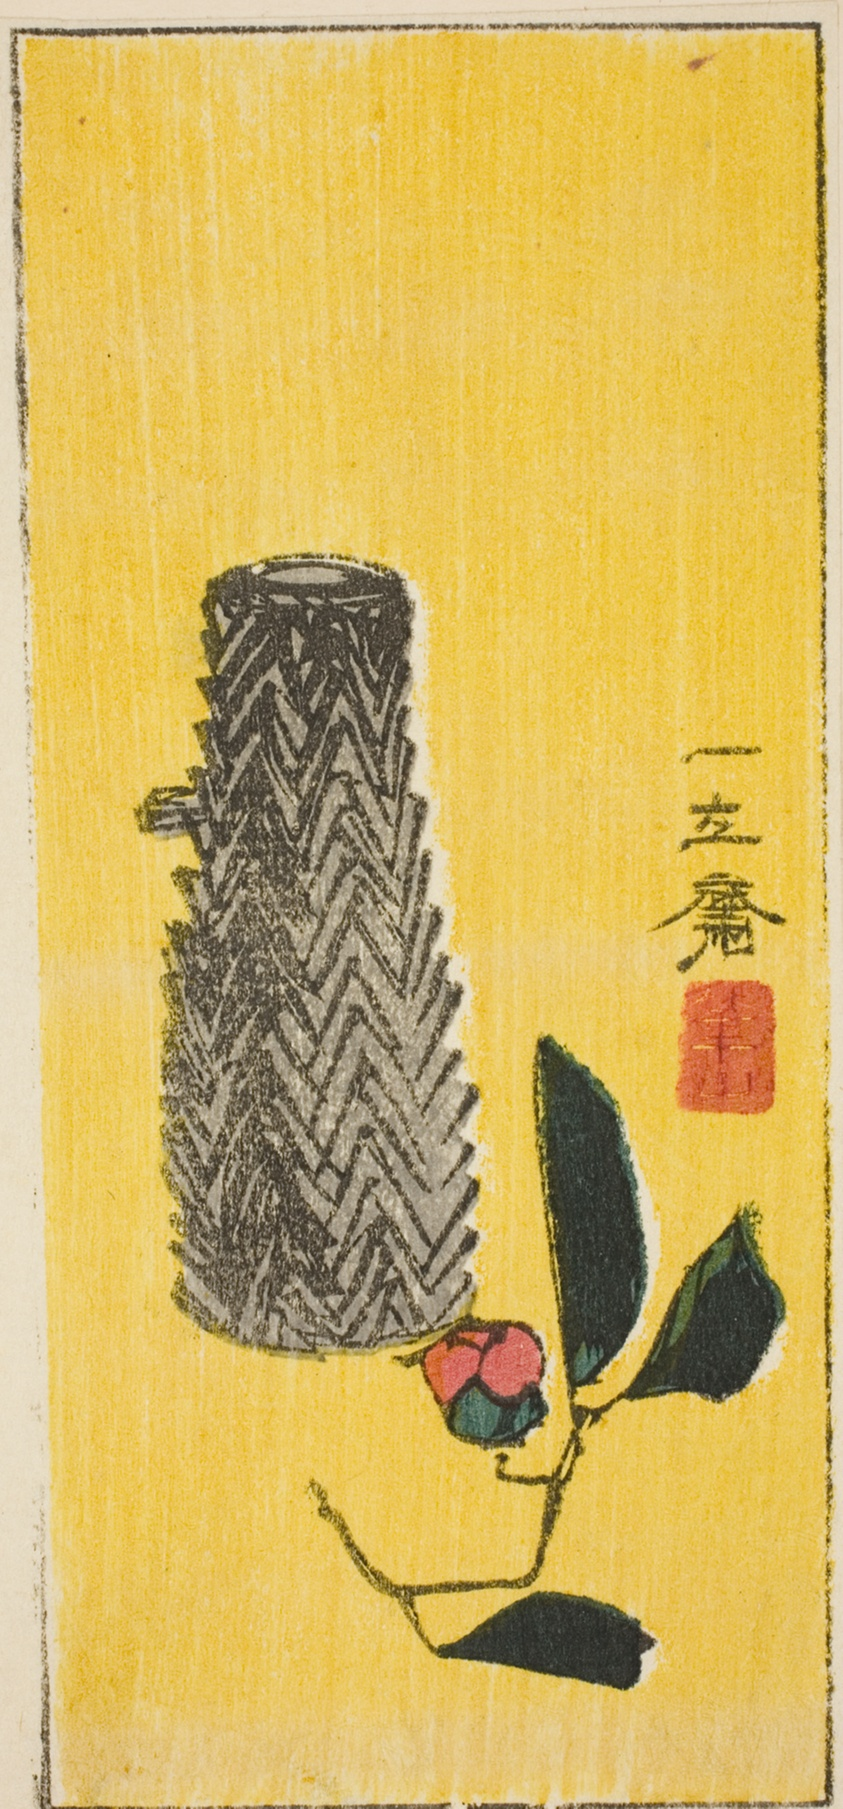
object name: Print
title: Camellia and basket, section of an untitled harimaze sheet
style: Japanese (culture or style)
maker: Utagawa Hiroshige 歌川 広重; Japanese, 1797-1858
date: c. 1850s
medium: Color woodblock print; section of harimaze sheet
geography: Japan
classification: woodblock print; print; asian art